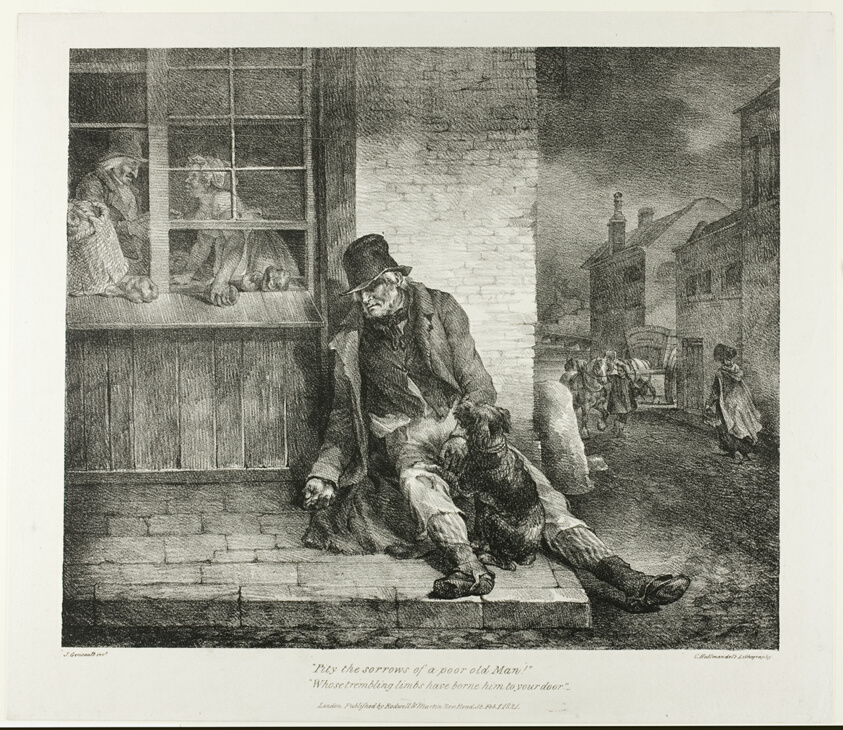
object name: Print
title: Pity the Sorrows of a Poor Old Man!... plate 2 from Various Subjects Drawn from Life on Stone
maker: Jean Louis André Théodore Géricault (French, 1791-1824); printed by Charles Joseph Hullmandel (German and English, 1789-1850); published by Rodwell and Martin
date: 1821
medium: Lithograph in black on ivory wove paper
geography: France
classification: lithograph; print; prints and drawing